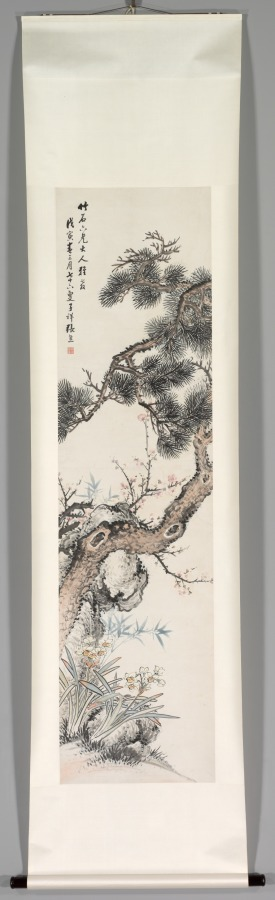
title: Three Purities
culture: China, Xiaxing, Qing dynasty (1644-1911)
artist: Zhang Xiong (Chinese, 1803–1886)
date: 1800s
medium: hanging scroll, ink and color on paper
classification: Painting